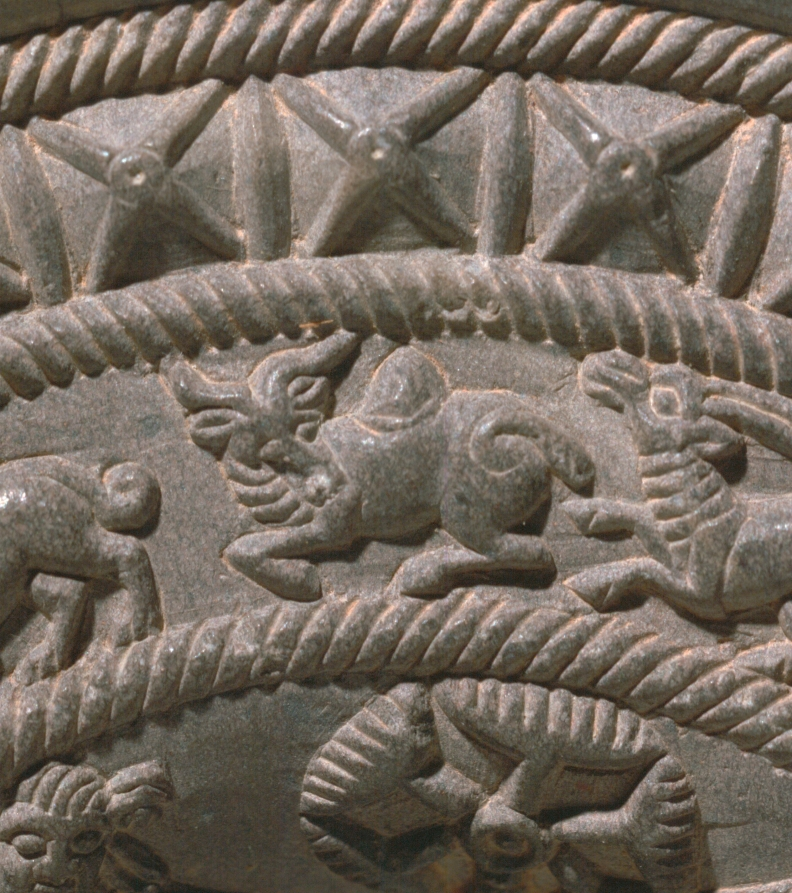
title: Ringstone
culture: India, Maurya period (322–185 BCE)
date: 200s BCE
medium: steatite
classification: Sculpture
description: Ringstones are among the earliest works of art to be created in stone during India's historical period. This example is finely carved with detailed images of affectionate couples and palm trees, running animals, and geometric motifs in concentric circles. The function of ringstones remains uncertain, since none of the surviving examples is inscribed or explained in a text.